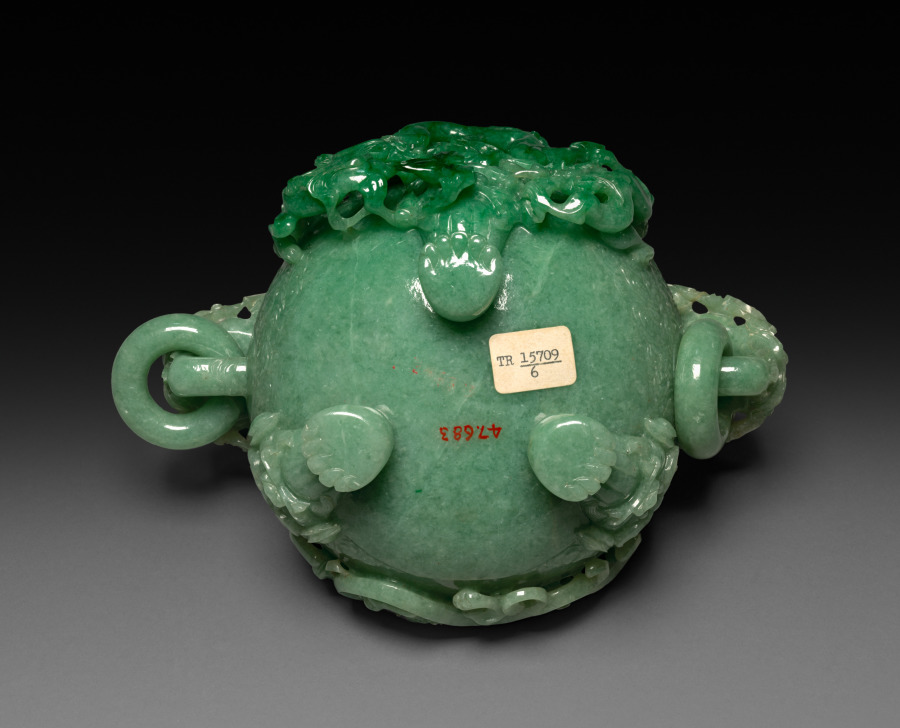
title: Three-Sectional Altar Group: Koro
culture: China, Qing dynasty (1644-1911)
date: 1644–1911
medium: jade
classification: Jade